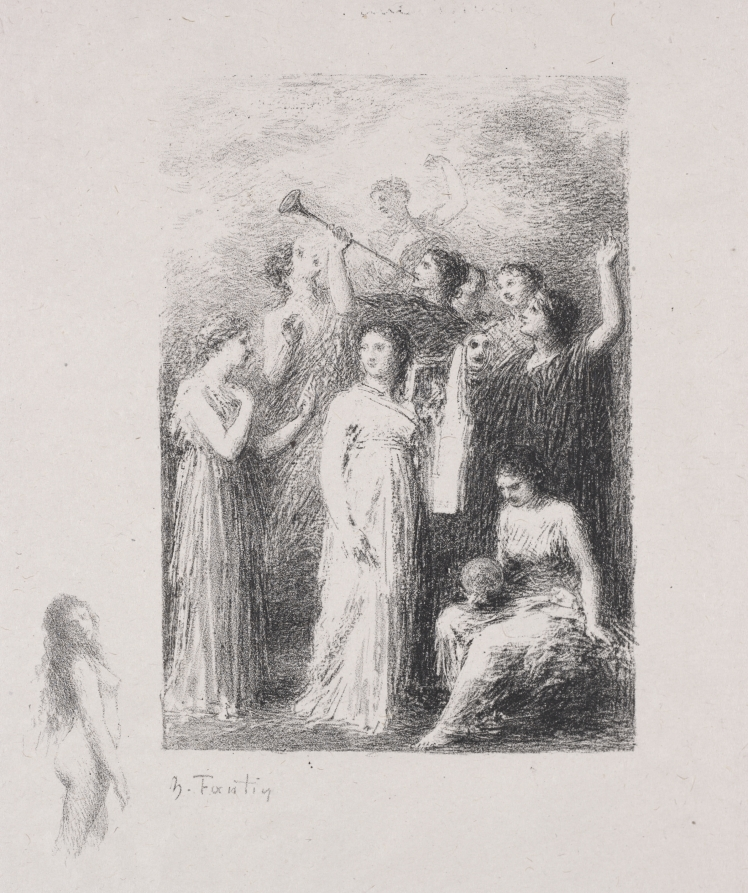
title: The Blind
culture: France, 19th century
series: Illustrations for the Poems of André Chénier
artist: Henri Fantin-Latour (French, 1836–1904)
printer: Auguste Clot (French, 1858–1936)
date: 1903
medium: lithograph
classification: Print